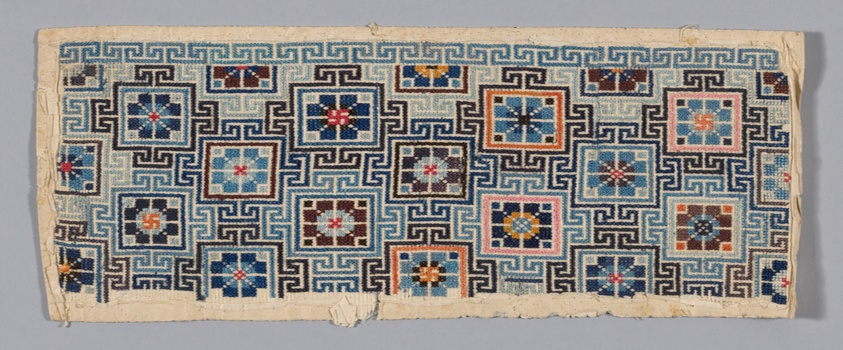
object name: Costume and Accessories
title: Band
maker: Han-Chinese (China)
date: Qing dynasty (1644–1911), 1875/1900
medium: Forty-four pairs and eight odd pieces of embroidered sleeve, ankle bands, etc. on gauze.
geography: China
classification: costume - embroidery; embroidery; costume